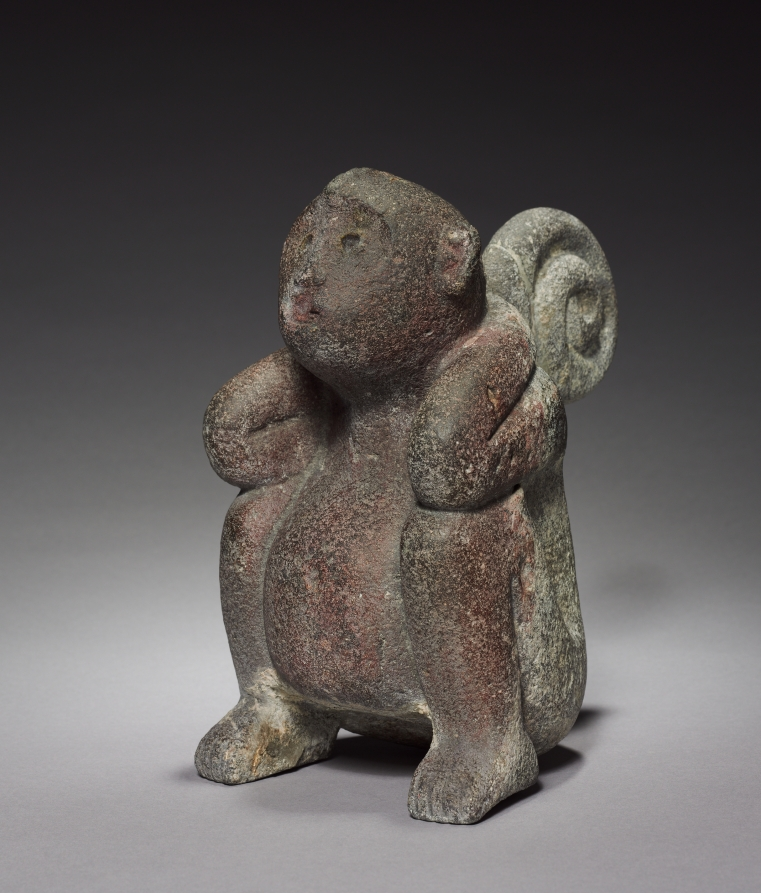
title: Monkey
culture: Central Mexico, Tacuba, Aztec, Post-Classic Period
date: 1325–1519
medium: stone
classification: Stone